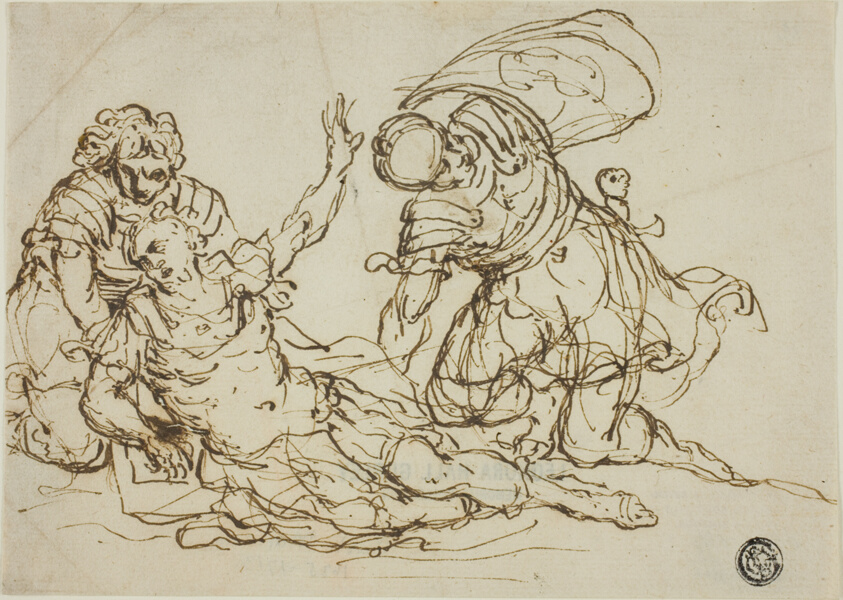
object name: Drawing and Watercolor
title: Wounded Warrior and Two Companions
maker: Unknown Artist; Italian, 17th century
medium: Pen and iron gall ink on ivory laid paper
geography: Italy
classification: pen and ink drawings; drawings (visual works); prints and drawing